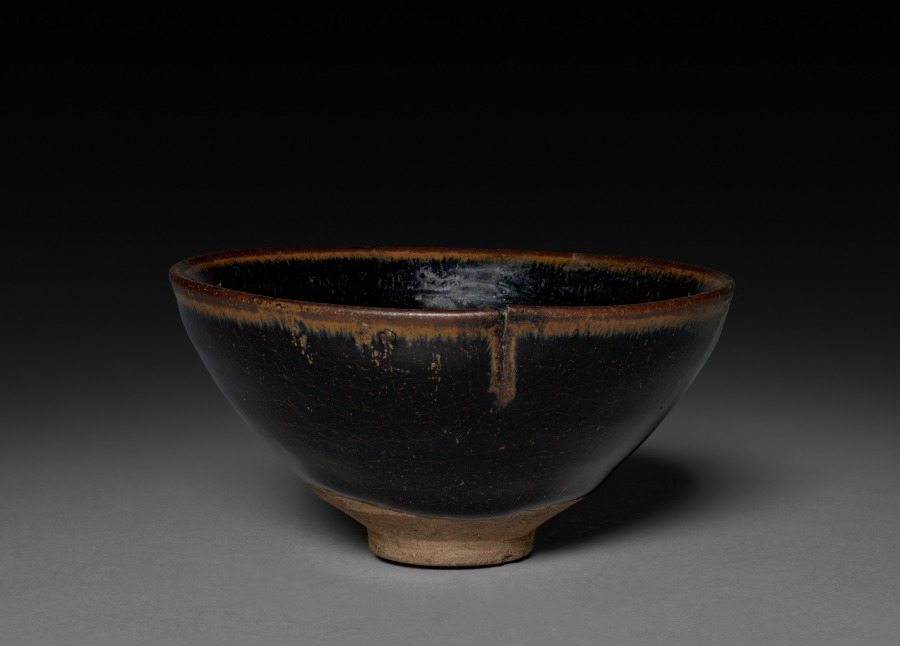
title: Tea Bowl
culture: China, near Shui ch'i, Song dynasty (960-1279)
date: 960–1279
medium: Stoneware, Jian ware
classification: Ceramic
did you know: Jian ware was very popular with the tea cultures in China and Japan.